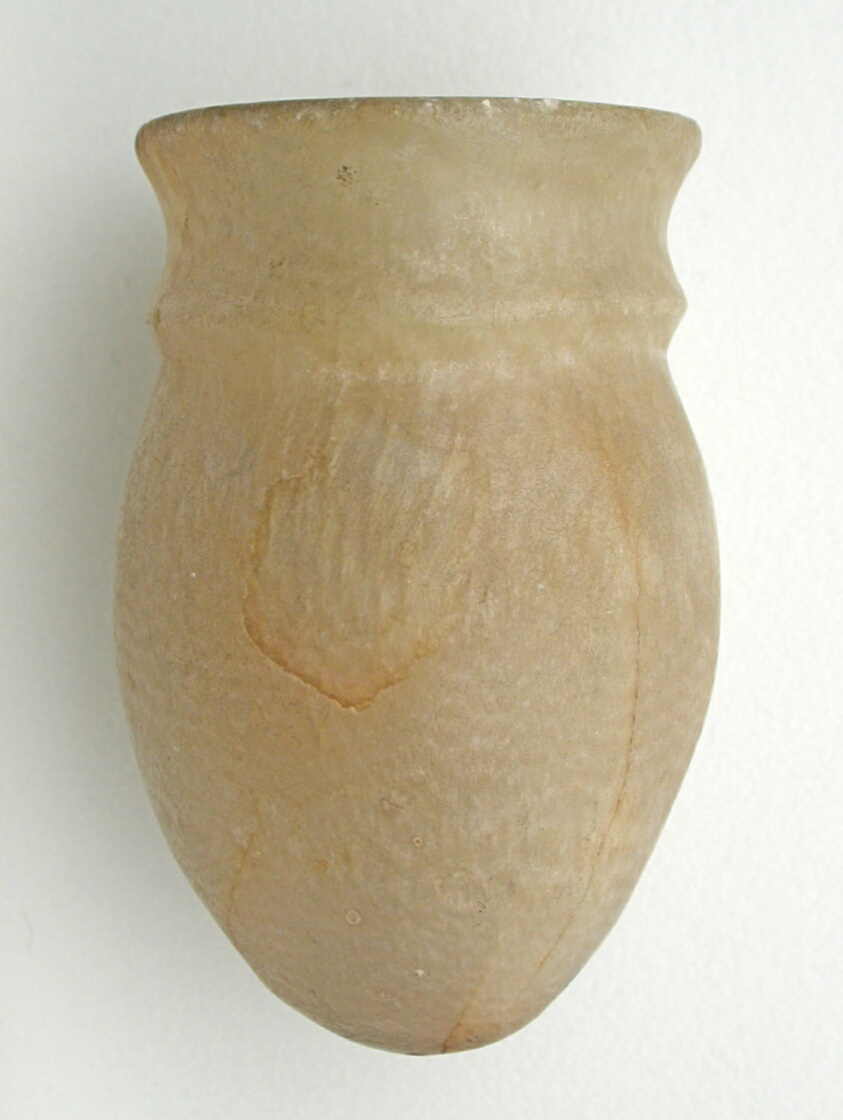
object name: Vessel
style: old kingdom, first intermediate period, egyptian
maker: Egyptian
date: Old Kingdom, Dynasty 5–6 (about 2494–2181 BCE)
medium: Travertine (Egyptian alabaster)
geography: Egypt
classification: vessel; stone; ancient art